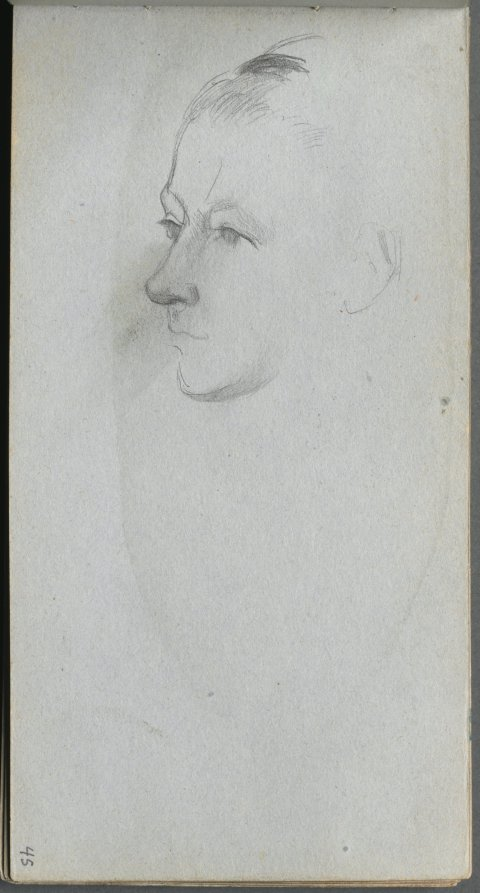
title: Sketchbook, page 45: Woman's Face, 3/4 View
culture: France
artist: Ernest Meissonier (French, 1815–1891)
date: c. 1860s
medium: graphite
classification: Bound Volume